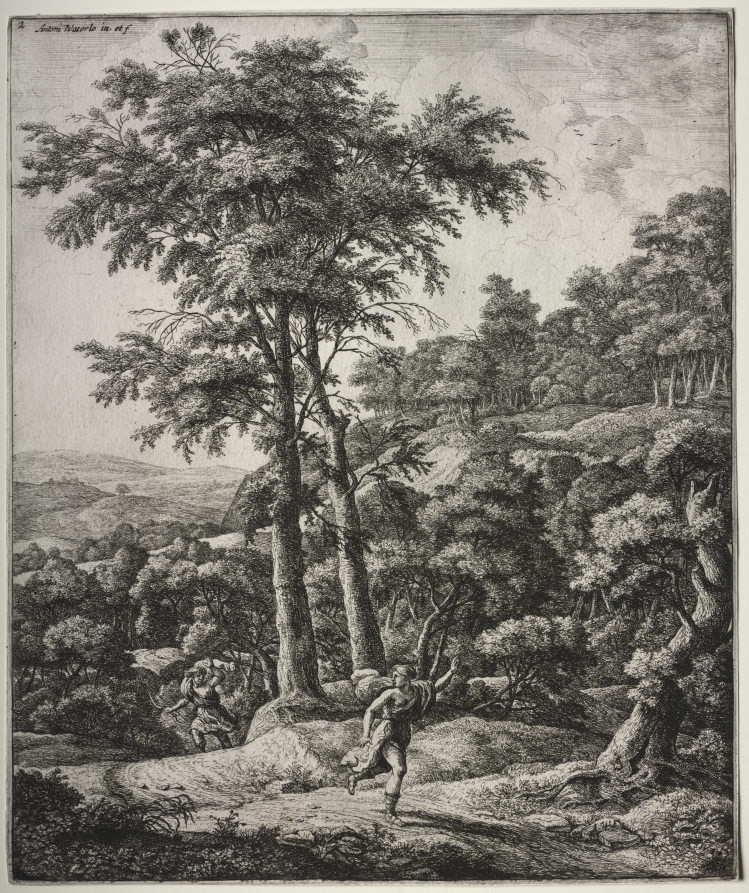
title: Six large upright landscapes with scenes from Ovid's Metamorphoses: Apollo and Daphne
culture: Netherlands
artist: Anthonie Waterloo (Dutch, 1609/10–1690)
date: 1640–90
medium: etching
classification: Print